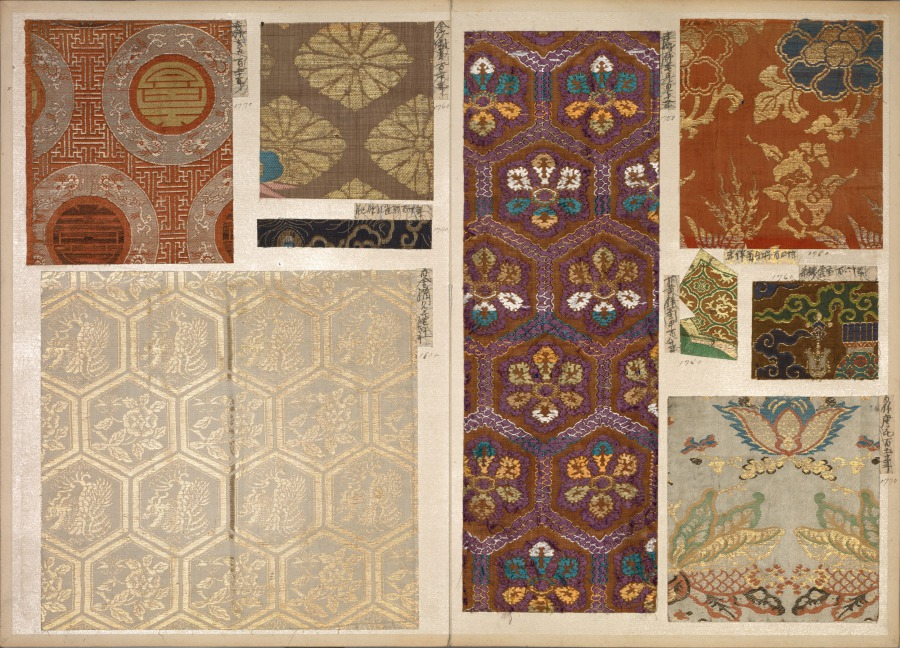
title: Album of Textile Samples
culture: Japan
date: 1790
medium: silk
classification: Textile